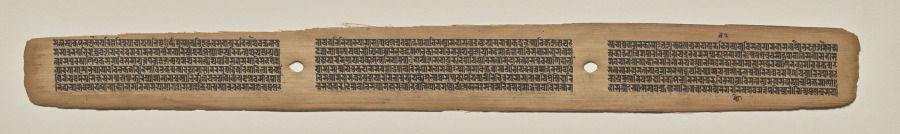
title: Text, folio 184 (recto), from a Manuscript of the Perfection of Wisdom in Eight Thousand Lines (Ashtasahasrika Prajnaparamita-sutra)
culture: Eastern India, Bihar, Vikramashila Monastery. Painting: Nepal, Kathmandu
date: Sunday, September 14, 1119 (year 239 of the Newar Samvat in the month of Ashvina)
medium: gum tempera and ink on palm leaves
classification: Painting